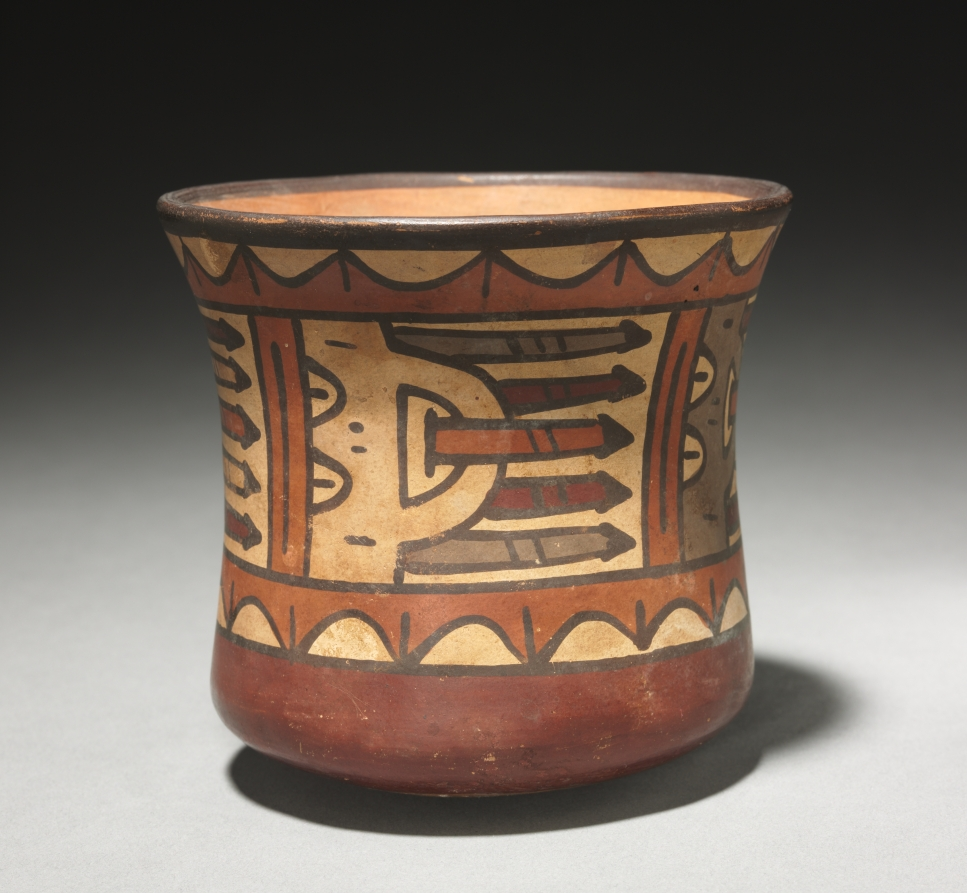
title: Bowl with Trophy Heads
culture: Peru, Nasca, Early Intermediate Period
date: c. 100–650 CE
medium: ceramic, slip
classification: Ceramic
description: Nasca is one of the two major cultures and ceramic styles of its periods, and one of the finest ceramic styles ever produced in the South American Andes. Vessel walls are thin, firing temperatures higher than in earlier times, and a variety of warm, earthen-toned slips come into use. This small bowl features repetitions of human trophy heads—a major Nasca motif that refers both to war and fertility.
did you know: Two important themes in Nasca art are war and fertility.